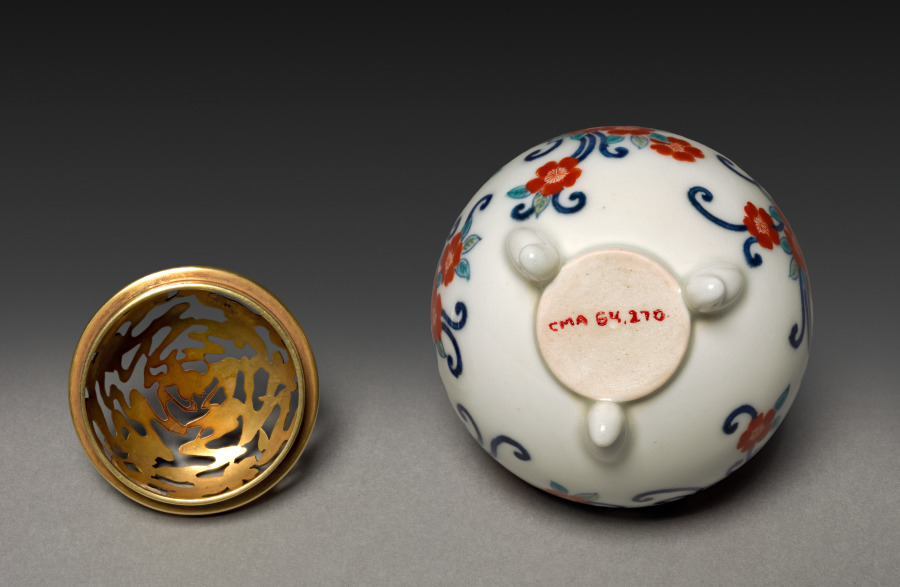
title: Incense Burner with Floral Scroll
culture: Japan, Edo period (1615–1868)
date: early to mid-1800s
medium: Porcelain with underglaze blue and overglaze color enamel (Hizen ware, Nabeshima style)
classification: Ceramic